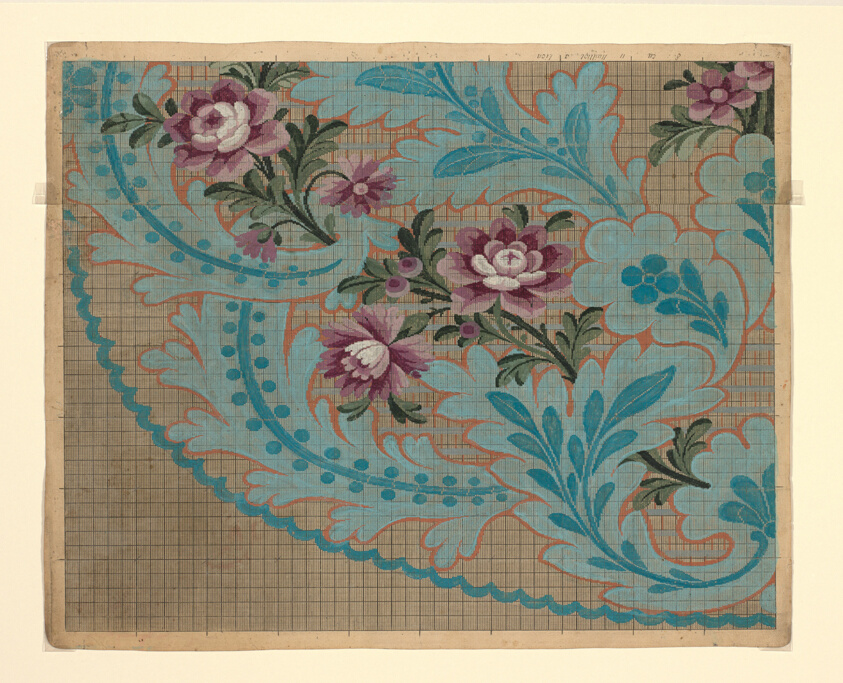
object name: Drawing and Watercolor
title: Mise-en-carte (Point-paper)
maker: France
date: 1760/90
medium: Ink and gouache on hand drawn graph paper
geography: France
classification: textile; accessory - paper design